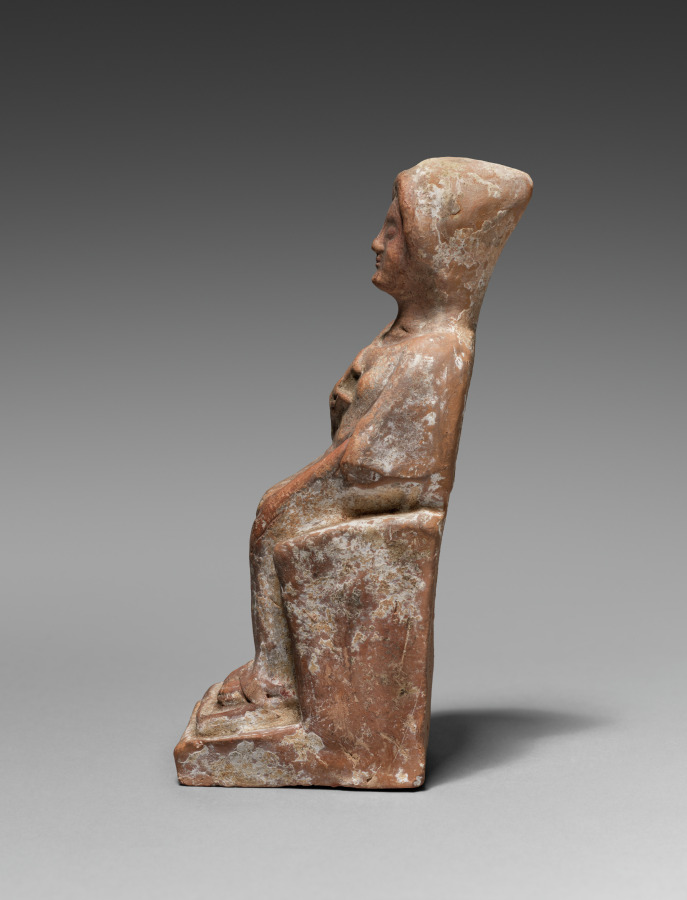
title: Archaic Figurine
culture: Greece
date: 500s BCE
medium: terracotta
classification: Sculpture